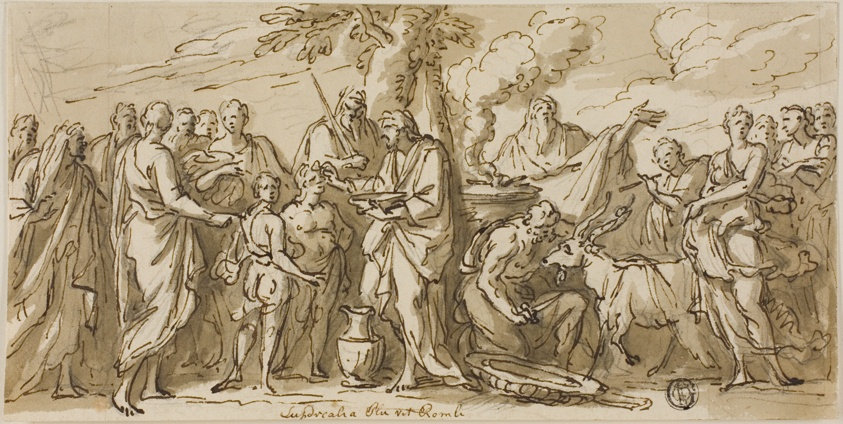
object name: Drawing and Watercolor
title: Lupercalia (recto), and Sketches of Figures (verso)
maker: James Thornhill (English, 1675-1734)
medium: Pen and brown ink, with brush and brown wash, over graphite (recto), and black chalk (verso), on ivory wove paper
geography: England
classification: pen and ink drawings; drawings (visual works); prints and drawing